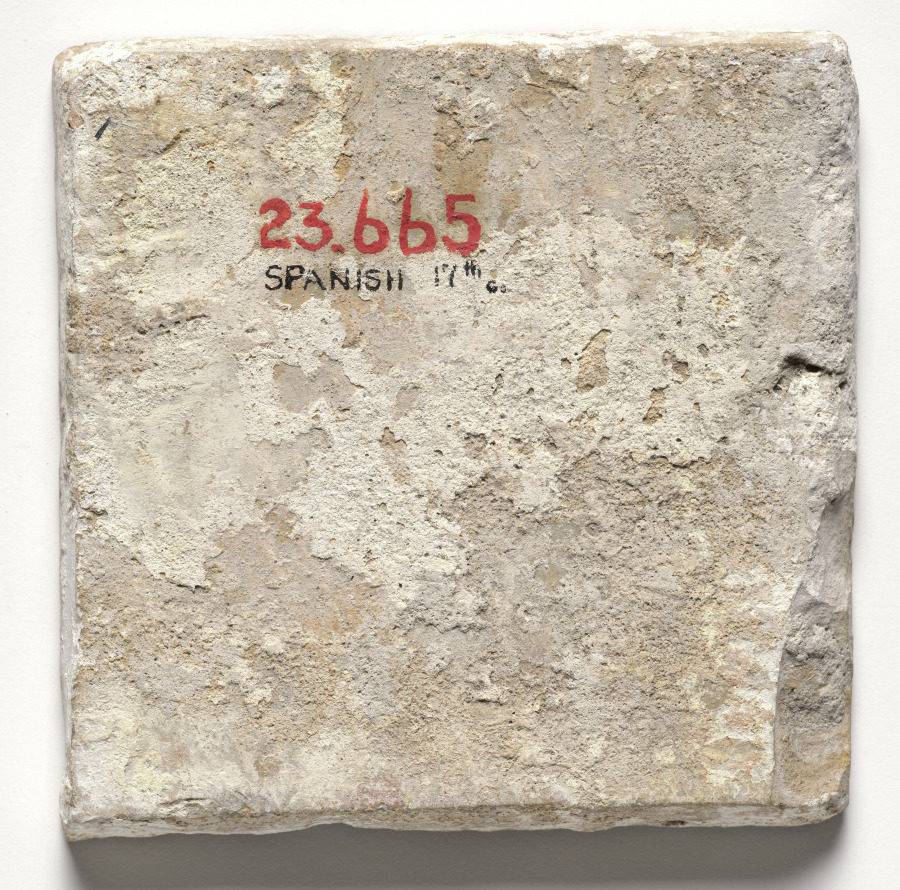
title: Wall Tile–Hunter with Rifle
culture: Spain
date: c. 1600s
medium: glazed ceramic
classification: Ceramic